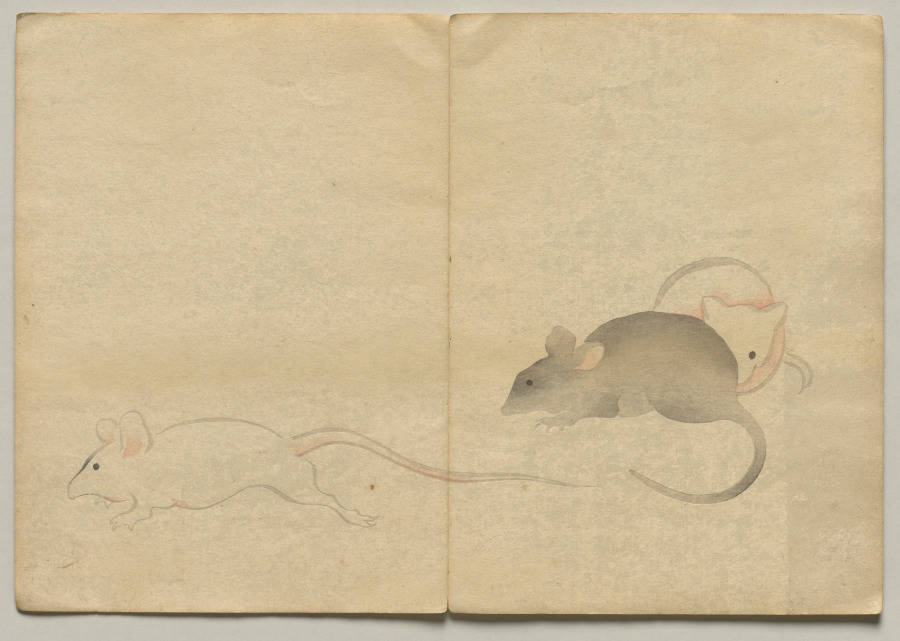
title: Scene from The Kōrin Picture Book (Volume 2)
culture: Japan, Edo period (1615–1868)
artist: Nakamura Hōchū (Japanese, d. 1819)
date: 1800s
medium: color woodblock printed book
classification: Bound Volume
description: Ogata Korin (1658-1716) was one of the most admired artists of Rimpa, or "decorative school painting." These books by the charming later-generation Rimpa artist Hochu record Korin's inventive designs.